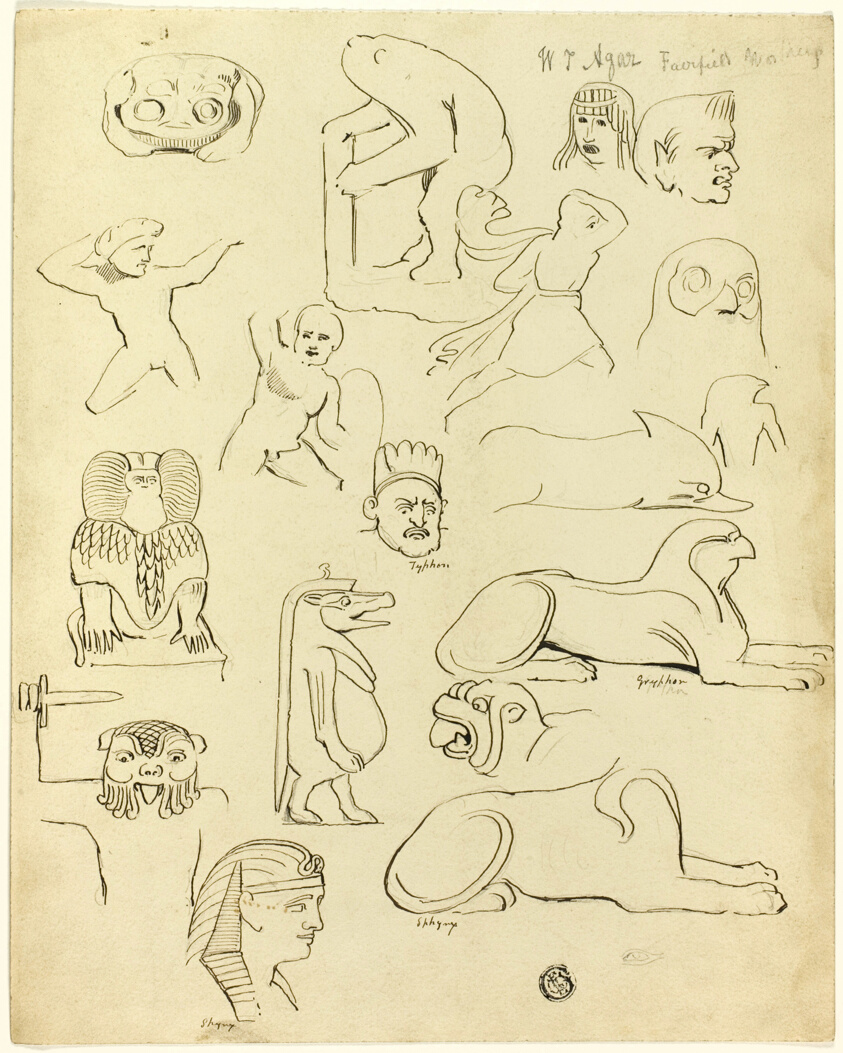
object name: Drawing and Watercolor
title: Sketches After Sculptures and Reliefs, Mainly Egyptian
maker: W.T. Agar; British, 19th century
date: 19th century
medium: Pen and brown ink, over graphite, on cream wove paper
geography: United Kingdom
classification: pen and ink drawings; drawings (visual works); prints and drawing